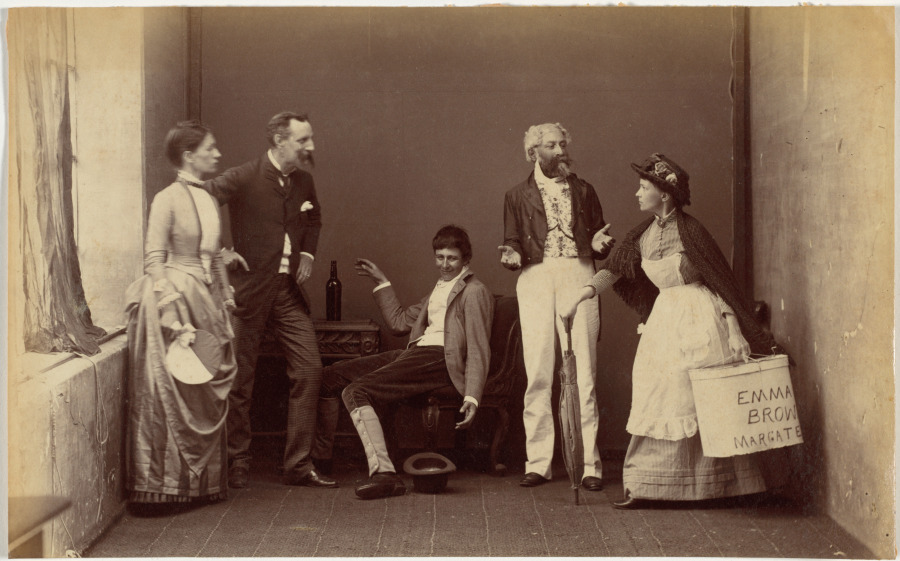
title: Fancy Group, Indore I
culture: India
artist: Raja Deen Dayal (Indian, 1844–1905)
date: 1886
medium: albumen print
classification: Photograph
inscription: Written in pencil on verso: “2766”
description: Entertainments at “fancy dress” or costume parties often included amateur theatricals or tableaux vivants—static scenes drawn from literature, history, or artworks. Here, Deen Dayal captured three moments distilled from a popular novel or play. The guests—all middle or upper class—perform as characters ranging from the working class to ladies and gentlemen. The woman holding a bucket labeled “Emma Brown of Margate” was likely playing a fishwife selling her husband’s catch. Because the photographic technology of the time required strong daylight, the photographs would have been made on a separate occasion, not at the party.